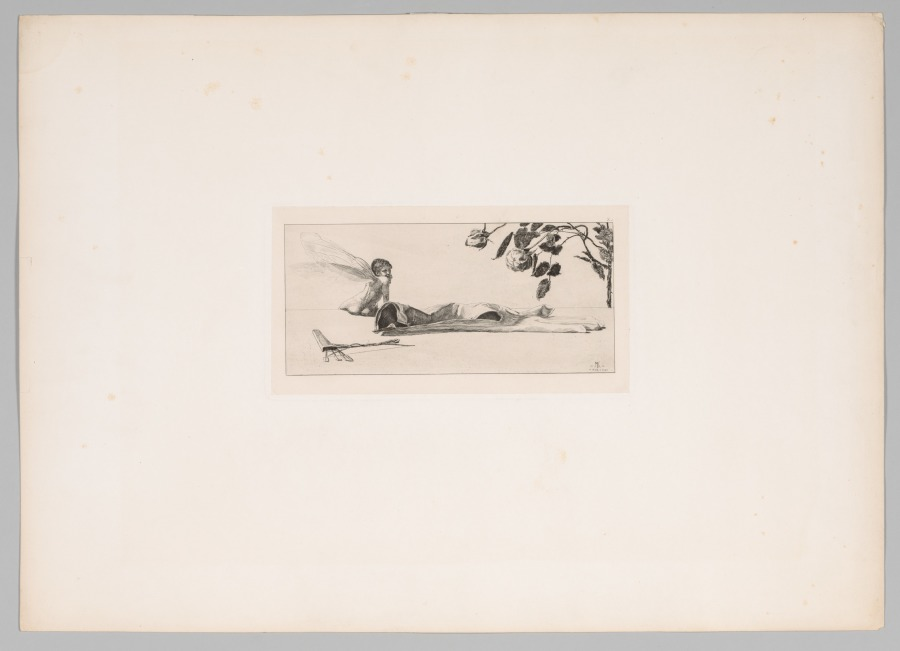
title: A Glove: Amor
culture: Germany, 19th century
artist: Max Klinger (German, 1857–1920)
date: 1880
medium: etching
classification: Print